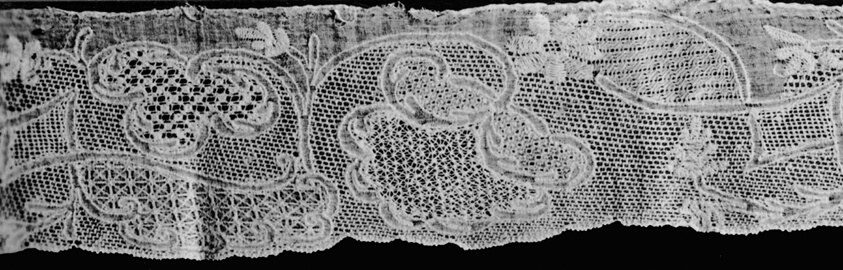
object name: Textile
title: Edge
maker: France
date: 19th century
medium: Cotton, plain weave; embroidered with cotton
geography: France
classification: textile; needlework (visual works)